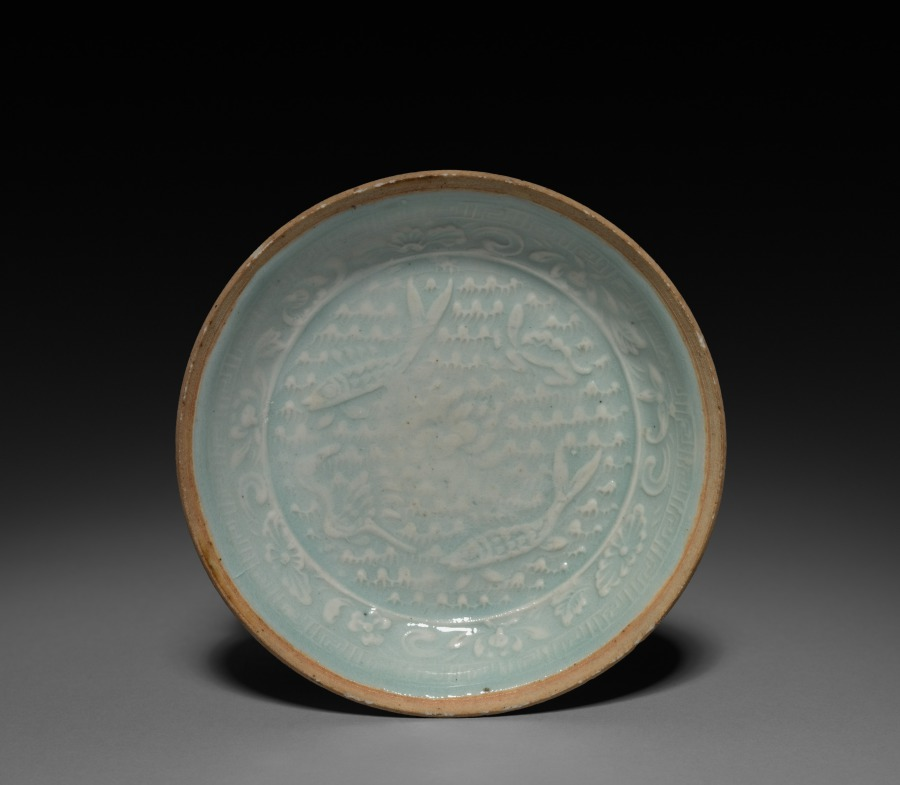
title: Saucer: Qingbai ware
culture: China, Southern Song Dynasty (1127-1279) - Yuan Dynasty (1271-1368)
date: 1200s-1300s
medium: porcelain with blue and white decoration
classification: Ceramic